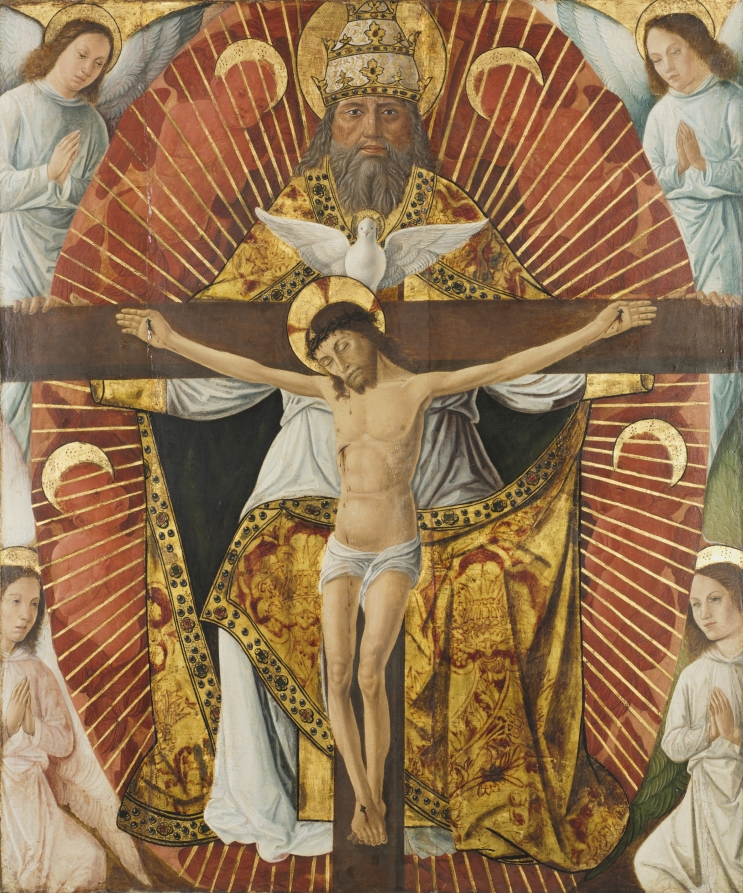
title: The Trinity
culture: France, Lyon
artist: Laurent Girardin (French, 1478)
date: c. 1460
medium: oil on wood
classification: Painting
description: Fundamental to Christian belief, the Holy Trinity refers to the three divine persons in God—God the Father, here depicted wearing a papal tiara, God the Son, crucified on the cross, and the Holy Spirit, represented as a dove. Juxtaposed with the Trinity's austere depiction are cherubim bathed in radiant red light, possibly influenced by stained glass windows that Girardin also designed in Lyon. God the Father wears a liturgical vestment, a sumptuous and bejeweled cope, or cape, fastened below the neck, typically worn by clergy for processional occasions. It is made of opulent crimson velvet with gold thread forming a large pomegranate pattern.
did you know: When the painting was acquired in 1960 the artist was not yet identified.